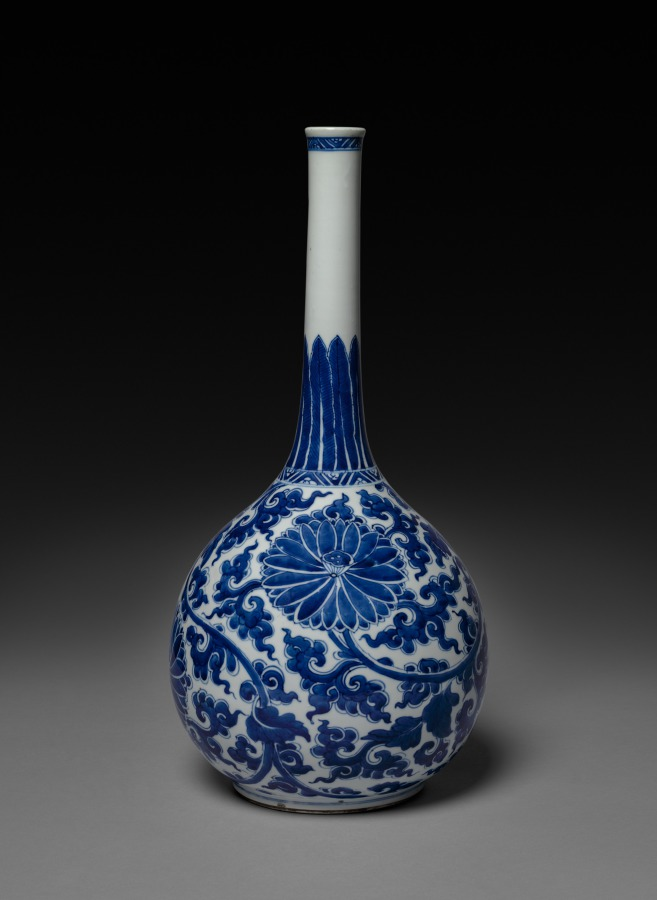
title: Bottle-shaped Vase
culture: China, Qing dynasty (1644-1911), Kangxi reign (1662-1722)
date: 1662–1722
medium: porcelain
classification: Ceramic